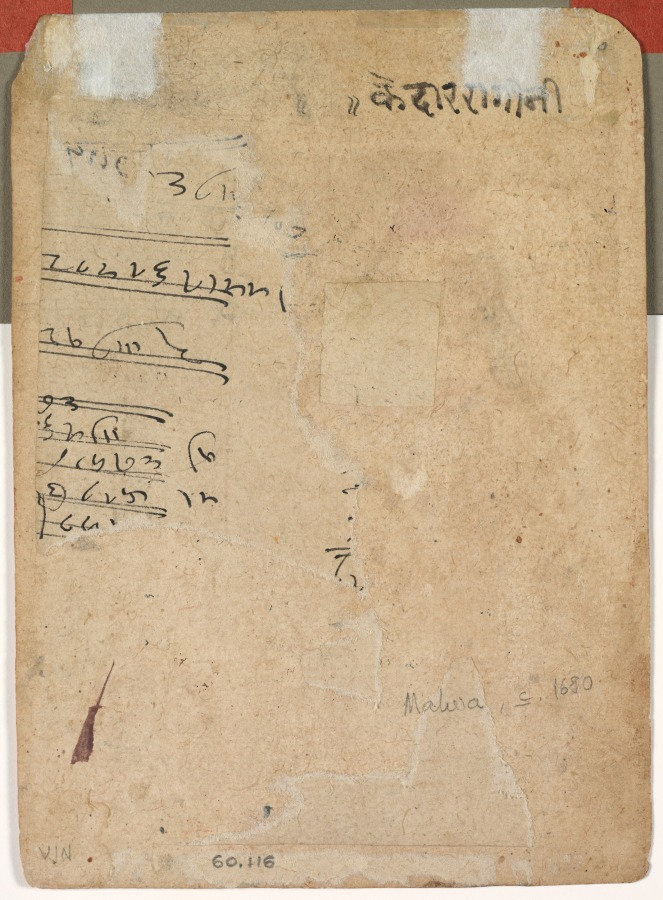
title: Kedara Ragini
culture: Central India, Malwa school, 17th century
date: c. 1660–70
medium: Gum tempera and gold on paper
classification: Painting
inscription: Labeled on reverse: "Kedara"; numbered on obverse: "35"